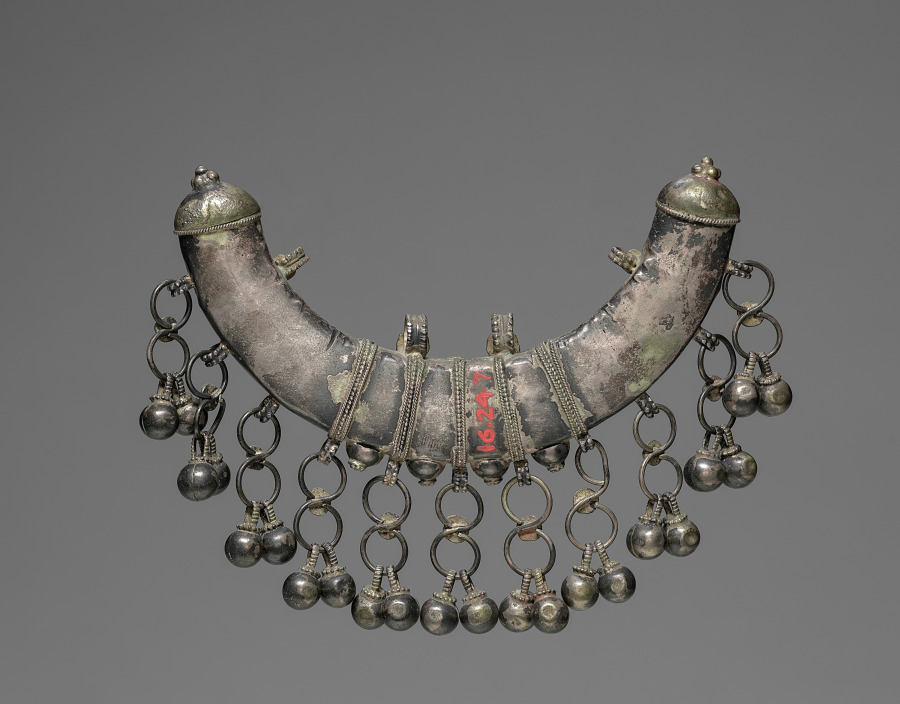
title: Part of a Necklace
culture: India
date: 1800s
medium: silver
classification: Jewelry